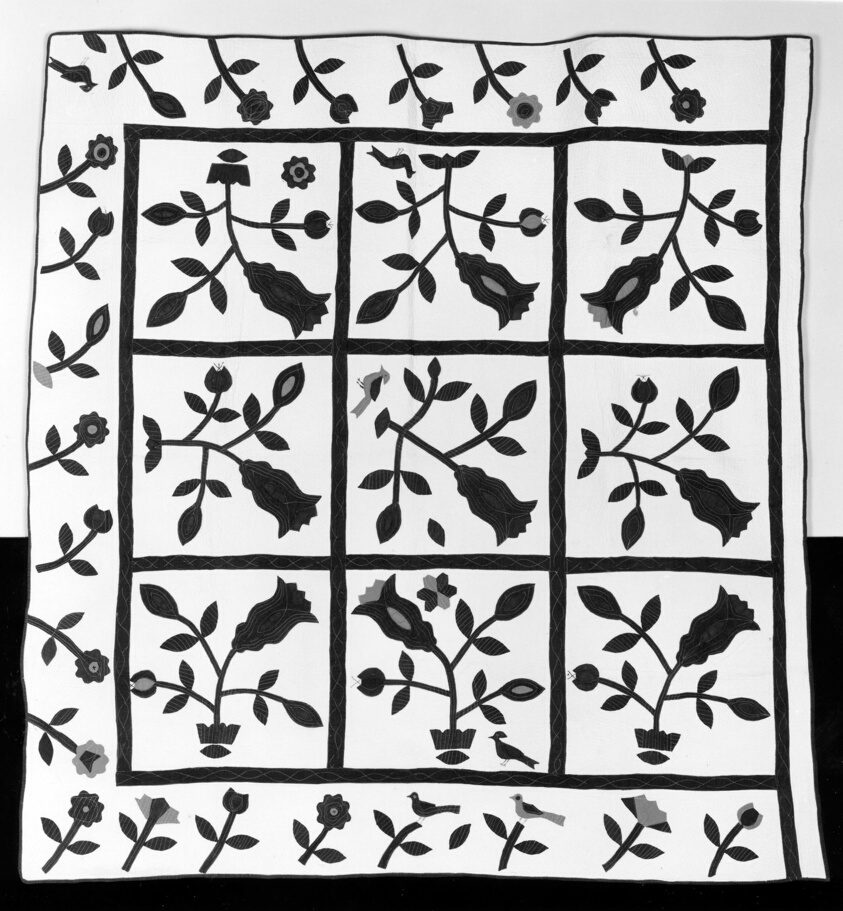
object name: Textile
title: Bedcover (Pumpkin Blossom Quilt)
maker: Possibly made by Mrs. George F. Gale; United States, Michigan, Washtenaw County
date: 1848/50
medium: Cotton, plain weave; appliquéd; embroidered in satin, chain and running stitches; machine stitch quilted; edged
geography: Michigan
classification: textile; needlework - quilt